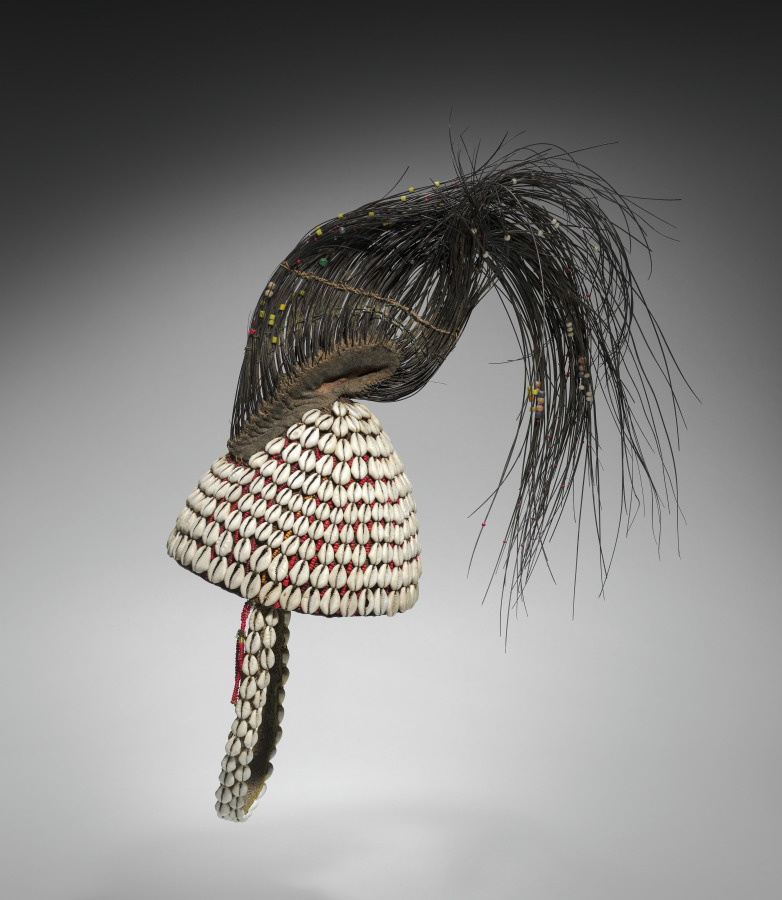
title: Bwami Prestige Cap (Mukuba or Nkumbu)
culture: Africa, Central Africa, Democratic Republic of Congo, Lega-style maker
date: early to mid-1900s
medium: Plant fibers, elephant rawhide and hair, cowrie shells, glass beads, and cord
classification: Garment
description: Hats of different types, sizes, and materials figure prominently in the Lega people’s Bwami association where they indicate status and rank. Cone-shaped hats made of canvas covered with cowrie shells and surmounted by an elephant tail are worn during initiations into kindi, the highest of the five male grades. This prestige cap uses a variety of local and imported materials to show its wearer's importance. The plant fibers that support the hat and the elephant hair were sourced in Central Africa, while the beads and cowrie shells were imported. The beads were made in Europe, while the cowrie shells came from the Indian Ocean region. The might of Bwami members is likened to the elephant’s potentially destructive strength.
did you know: While identified with Africa, cowrie shells were generally imported from the Indian Ocean region. After being collected near the Maldives islands, these Indo-Pacific shells entered parts of Africa via overseas trade routes.